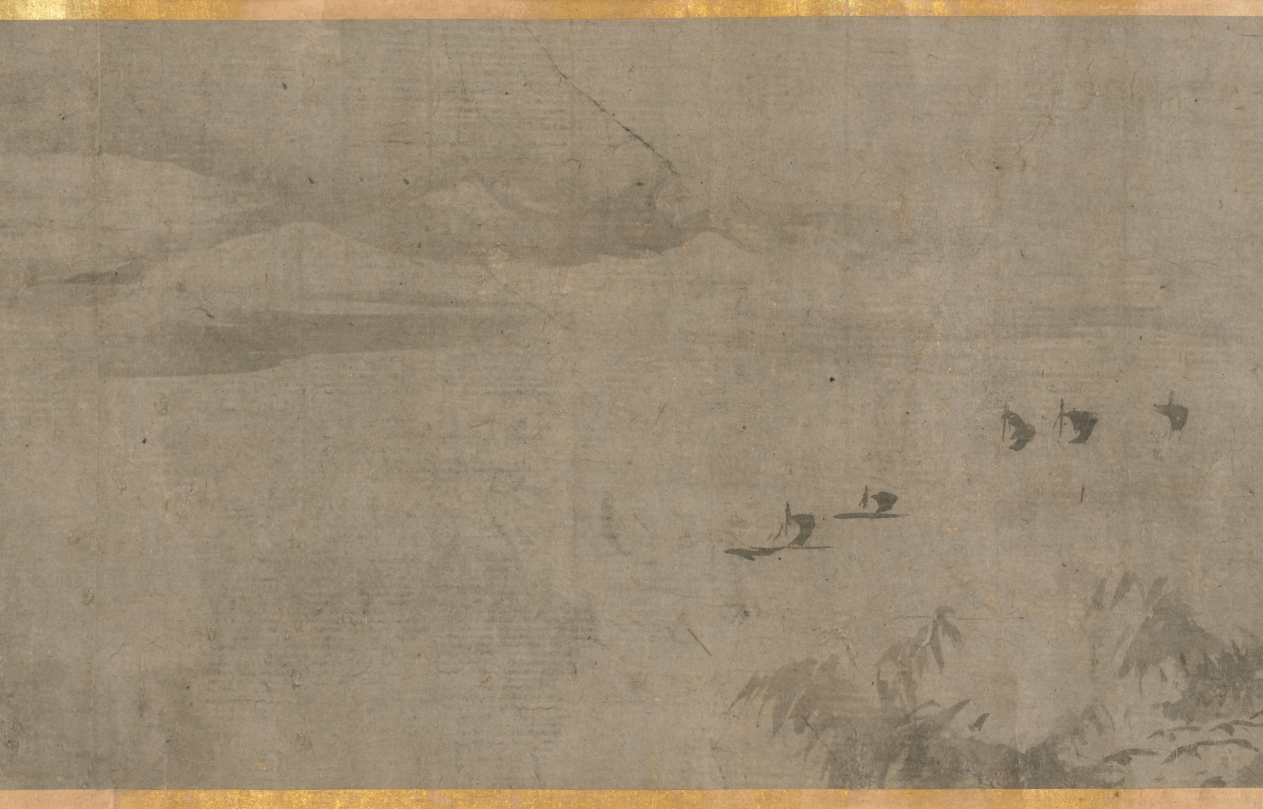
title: Eight Views of Xiao-Xiang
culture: Japan, Muromachi period (1392–1573)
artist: Sesson Shūkei (Japanese, c. 1492–c. 1577)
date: 1500s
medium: handscroll; ink on paper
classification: Painting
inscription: Signature and seal of artist at end of painting.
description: Eight Views of the Xiao and Xiang Rivers can be traced to 11th-century Chinese poems and paintings, the depiction of which had also become popular among Korean and Japanese painters. Xiao-Xiang refers to the region in present-day Hunan province where the Xiao and Xiang rivers converge. Few painters of the Eight Views had in fact seen the scenery; rather, they were trying to portray in ink and wash the lyrical qualities of dim light and a misty atmosphere typical of that region. Each of the poetic titles suggests a time of day, a season, or specific atmospheric conditions—subjects that challenged the abilities of the most talented artists. In this miniature painting (shukuzu) of the Muromachi period, Japanese Zen monk and painter Shukei Sesson depicted all eight views featured in Chinese prototypes: Wild Geese Descending to Sandbar; Returning Sails Off a Distant Coast; Mountain Market in Clearing Mist; River and Sky in Evening Snow; Autumn Moon over Dongting Lake; Night Rain on the Xiao and Xiang; Evening Bell from Mist-Shrouded Temple; and Fishing Village in Evening Glow.